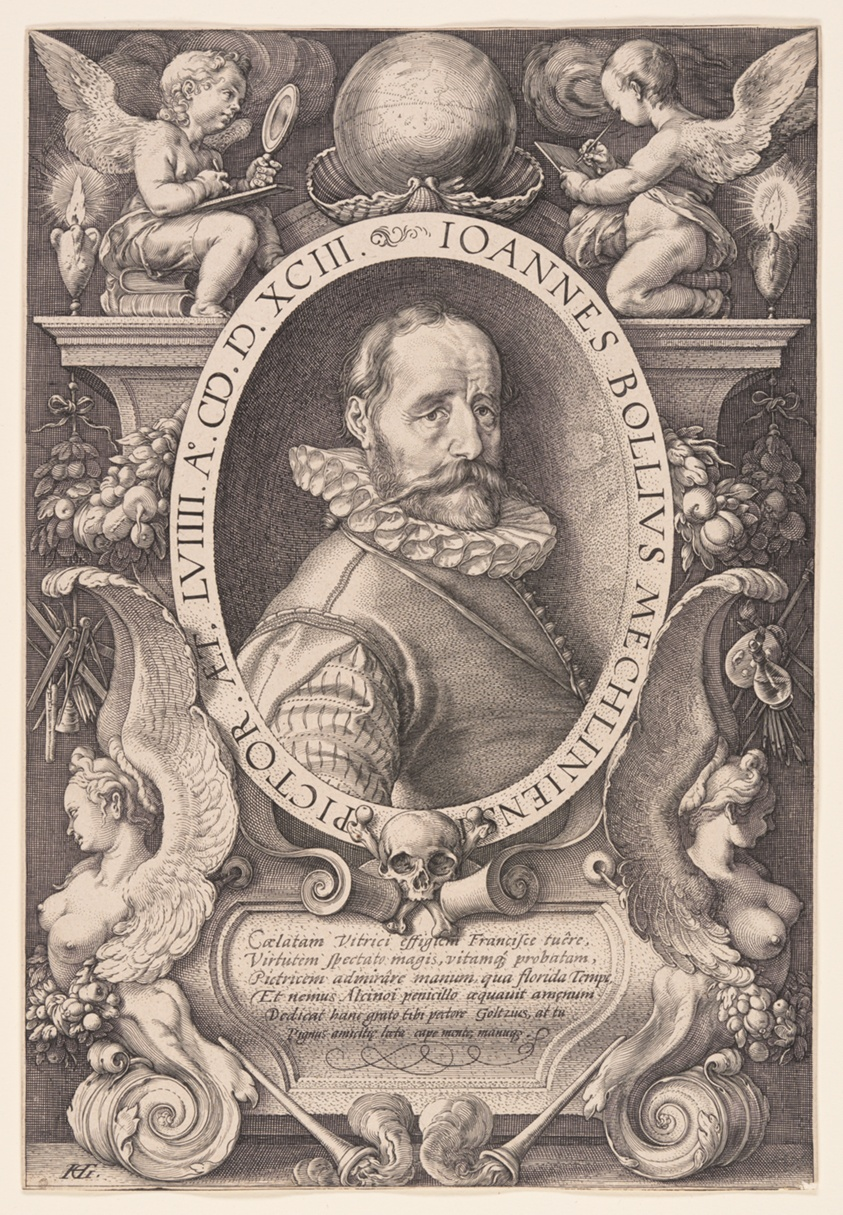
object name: Print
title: Hans Bol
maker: Hendrick Goltzius (Dutch, 1558–1617)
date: 1593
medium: Engraving on laid paper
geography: Netherlands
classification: engraving; paper; print; prints and drawing